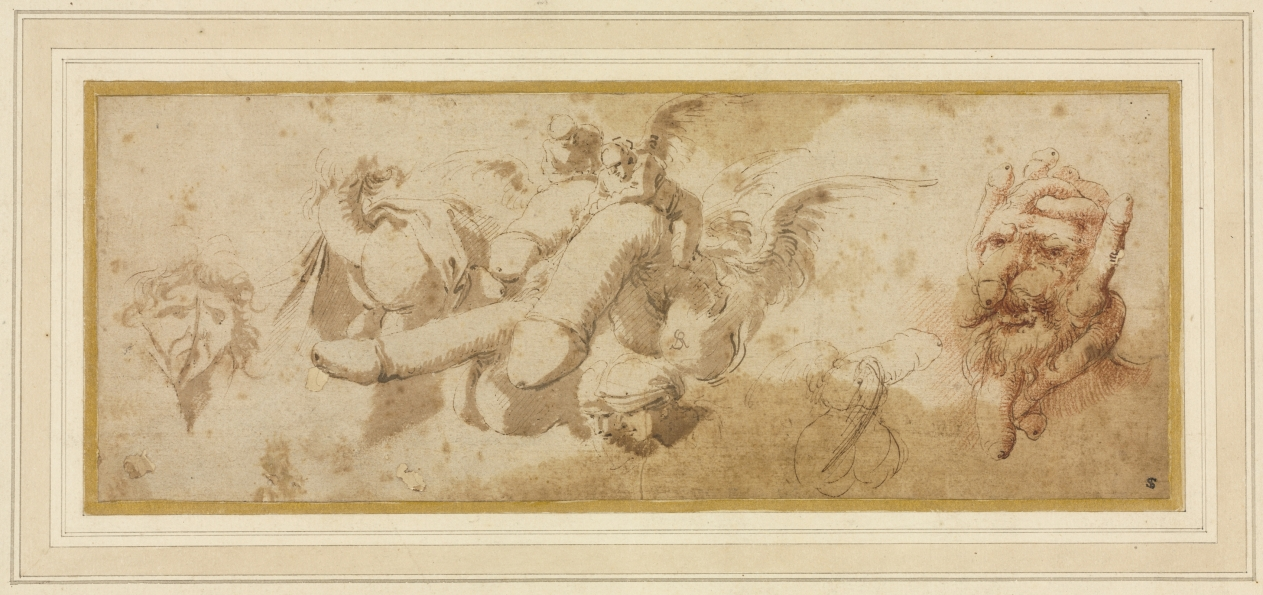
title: Sheet of Satirical Studies (Amorini Riding Phalli)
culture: Italy, 17th century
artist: Salvator Rosa (Italian, 1615–1673)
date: c. 1650s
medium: Pen and brown ink, wash, and red chalk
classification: Drawing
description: This outrageous and comical sheet stands out as one of the few existing examples of Rosa's representation of bawdy material. While Rosa was not interested in lewd imagery for vulgarity's sake, he certainly enjoyed intellectual jokes that advertised his erudite knowledge. The grotesque face at the right, and the cupids that ride the almost-elephantine phalli at center reference Classical and Renaissance motifs. Heads composed of objects-particularly the famous Testa di Cazzi ("head of penises")-were frequently used as decoration on Renaissance maiolica ceramics. This kind of imagery- like the museum's witchcraft paintings-would have been understood by 17th-century audiences as more than just grotesquerie. The exaggerated and lampooning qualities of this drawing both reference and parody these famous artistic traditions, showing how Rosa frequently used satirical humor to establish his identity as a sharp and sophisticated artist.